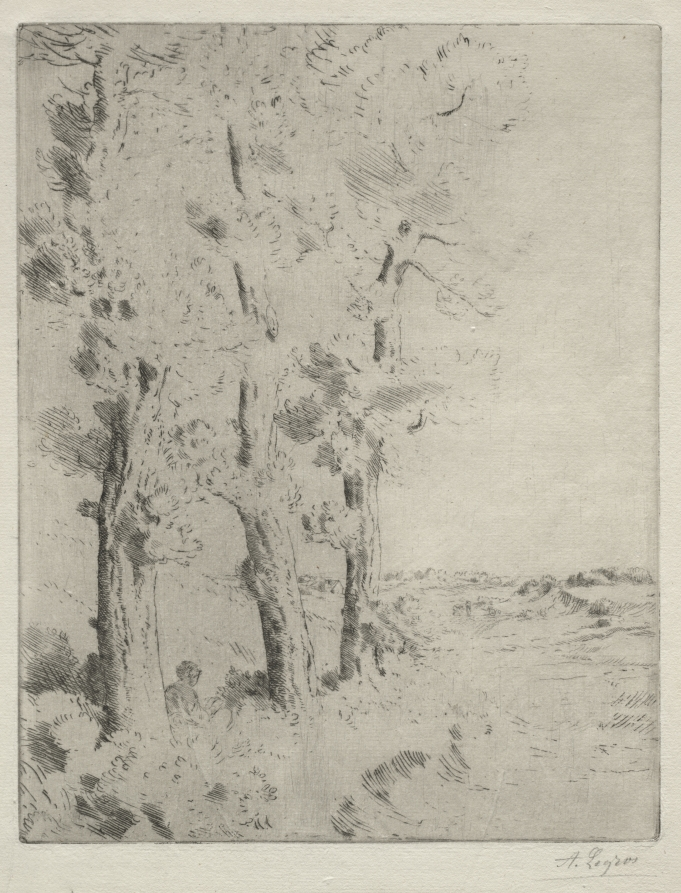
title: The Reader: The Lecture under the Trees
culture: France, 19th century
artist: Alphonse Legros (French, 1837–1911)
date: c. 1882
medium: drypoint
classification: Print